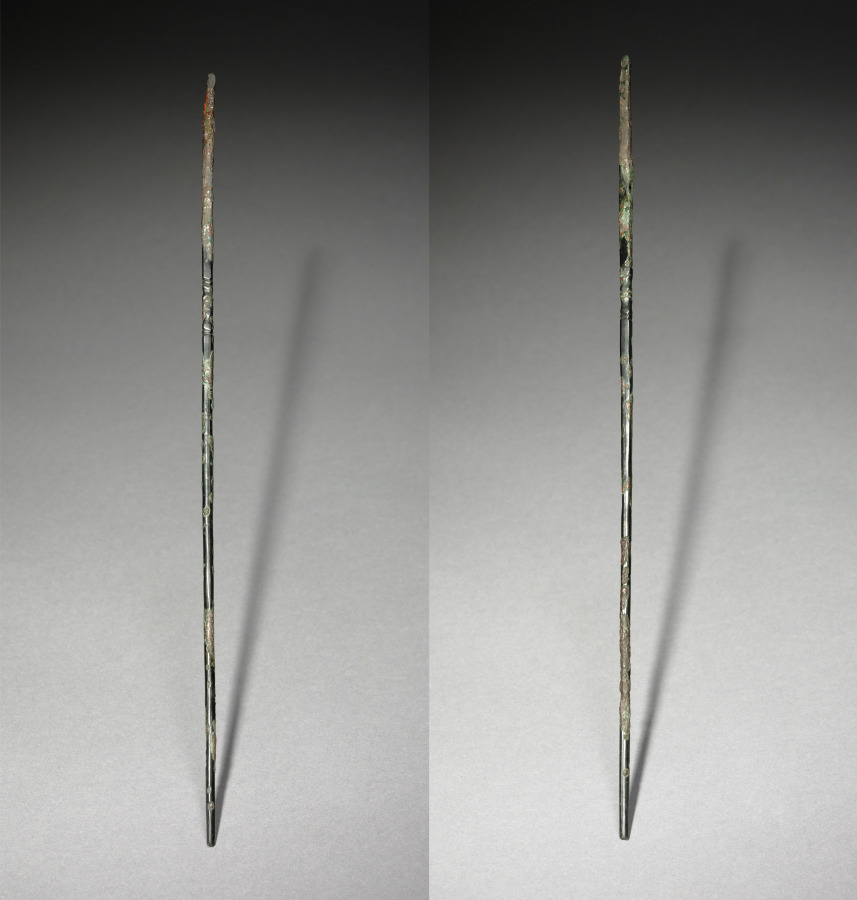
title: A Pair of Chopsticks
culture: Korea, Goryeo dynasty (918–1392)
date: 918–1392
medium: bronze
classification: Metalwork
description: In Korea, chopsticks made of metal such as brass, silver, and gold were excavated from ancient tombs and ruins dated to the 6th century at the earliest. Burial goods often include utilitarian objects such as table wares and utensils because the dead were believed to need them in the afterlife.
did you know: In contrast to the Chinese and Japanese, Koreans still prefer metal chopsticks (stainless steel and brass) to wooden ones.